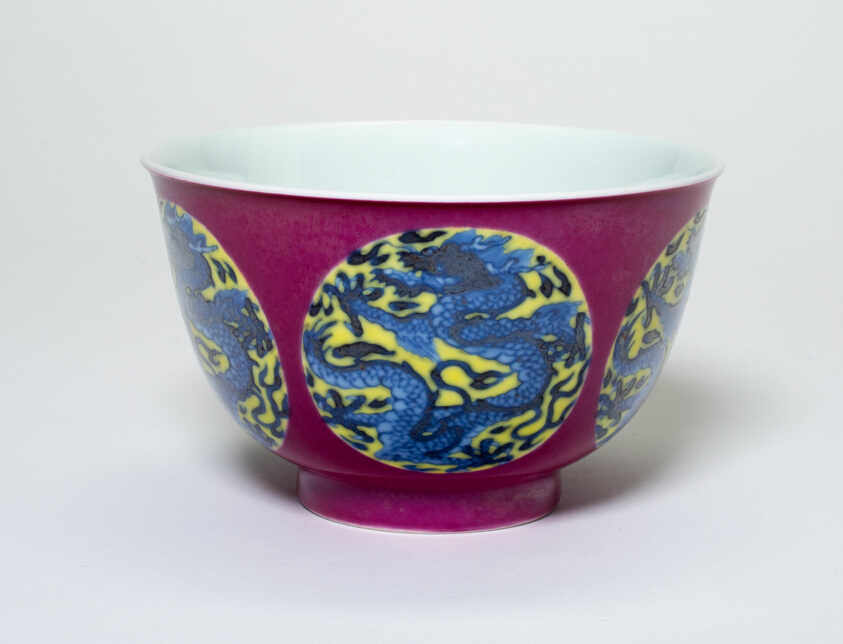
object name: Vessel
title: Cup with Dragon Medallions (Exterior) and Fruit (Interior)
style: Chinese (culture or style)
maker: China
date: Qing dynasty (1644–1911), Yongzheng reign mark and period (1723–1735)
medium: Porcelain with underglaze blue and overglaze enamel decoration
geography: China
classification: drinking vessel; porcelain; asian art; ceramics; vessel